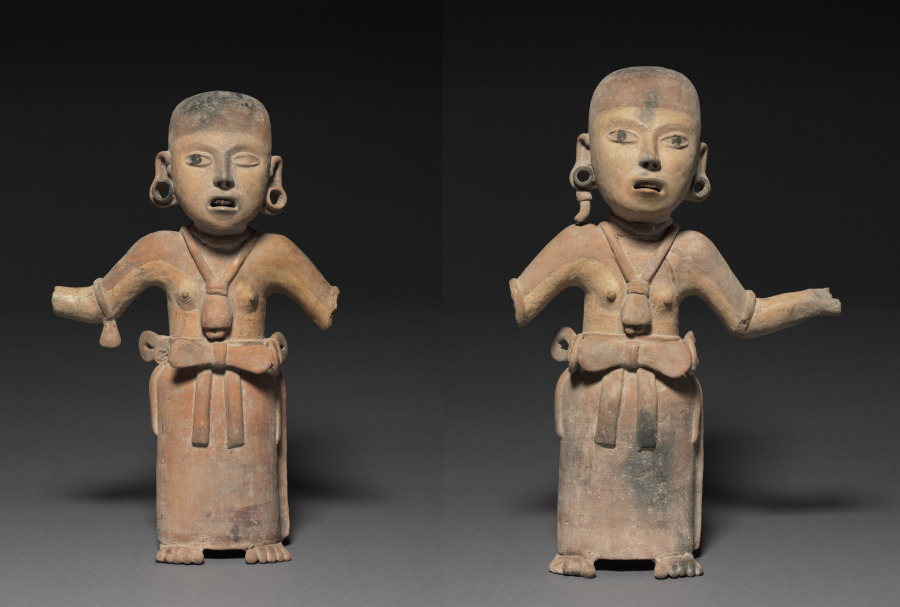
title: Pair of Female Figures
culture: Mexico, Southern Veracruz, Limon, Remojades Monumental Sculpture type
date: 200–500 CE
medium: pottery with burnished buff slip and asphalt paint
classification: Sculpture